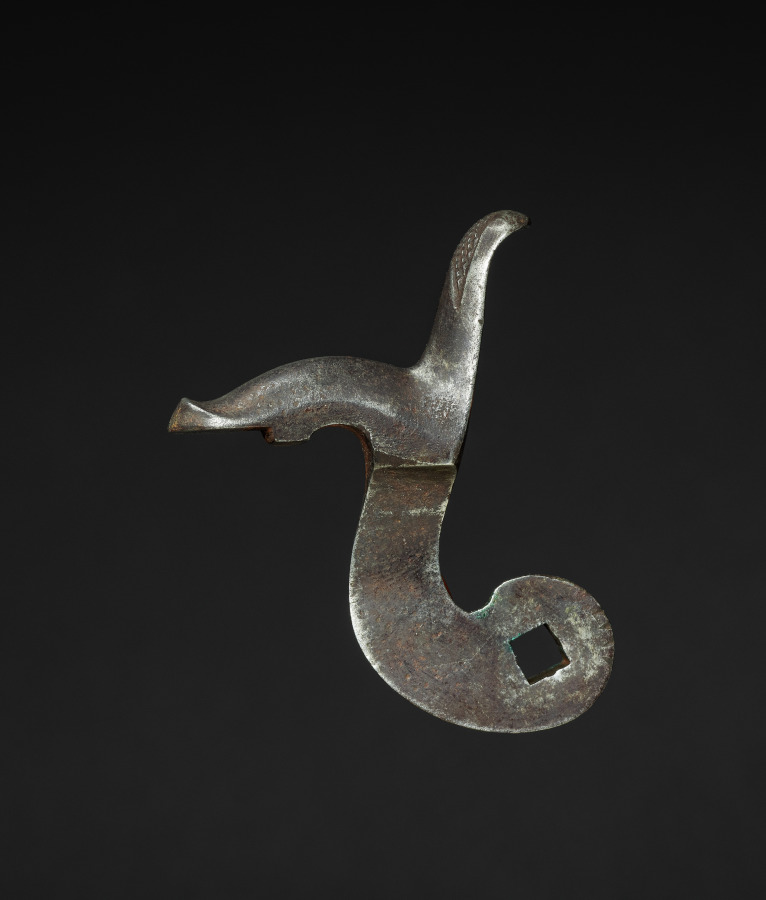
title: Gun-Lock Hammer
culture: England, early 19th century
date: c. 1800–1825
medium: steel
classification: Arms and Armor